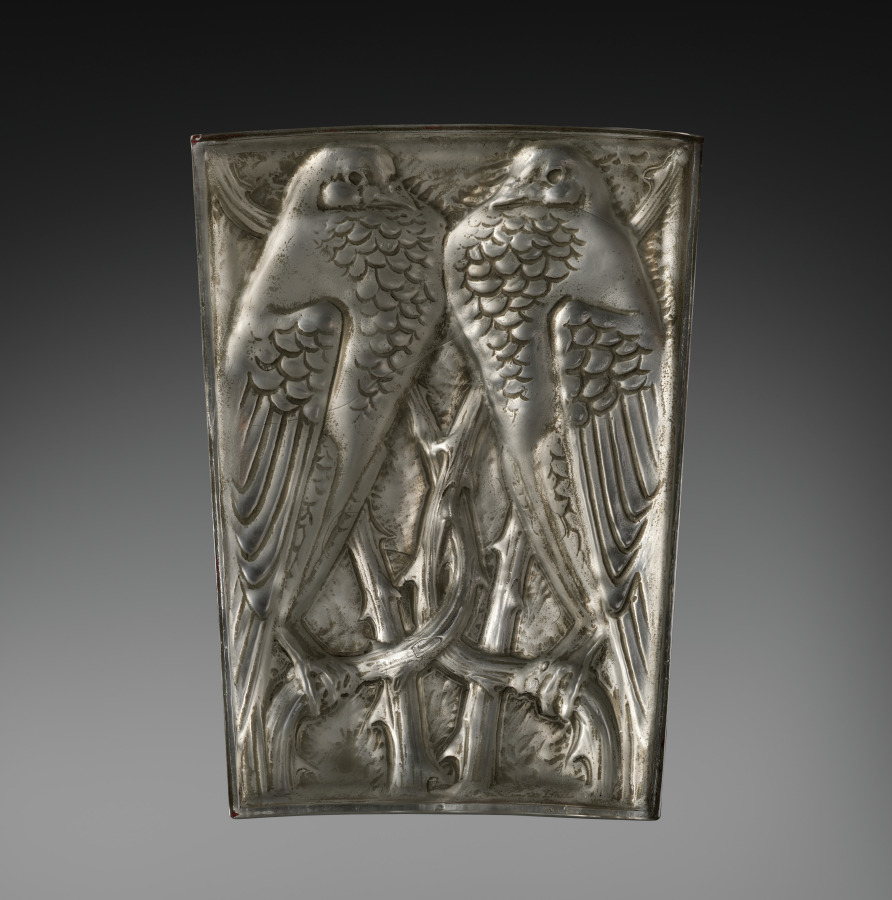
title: Section of the Two Pigeons Panel (Panneau deux pigeons)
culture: France, 20th century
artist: René Lalique (French, 1860–1945)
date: 1914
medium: molded glass with mirrored backplate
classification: Glass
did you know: The title of this work translates to curved panels with two pigeons.